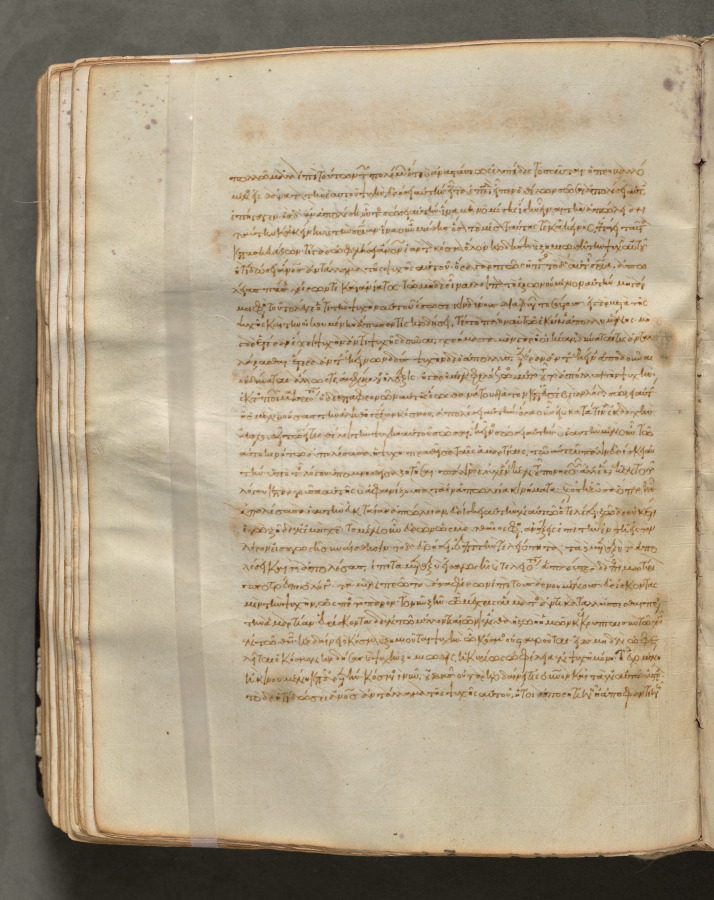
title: Text, folio 160 (verso), from a Gospel Book with Commentaries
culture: Byzantium, Constantinople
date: c. 1000–1100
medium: ink, tempera, and gold on vellum; leather binding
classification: Bound Volume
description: Each of the four gospels in this book opens on a page with brilliantly illuminated borders depicting the author of the text as well as birds-principally peacocks, symbols of the immortality of the soul-and fountains, representing the fountain of life and the salvation of the soul. This volume consists of 428 leaves with texts in Greek. Its level of sophistication suggests that it was probably written and decorated in a monastery in Constantinople.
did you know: Gospel Books were carried in procession through Byzantine churches.